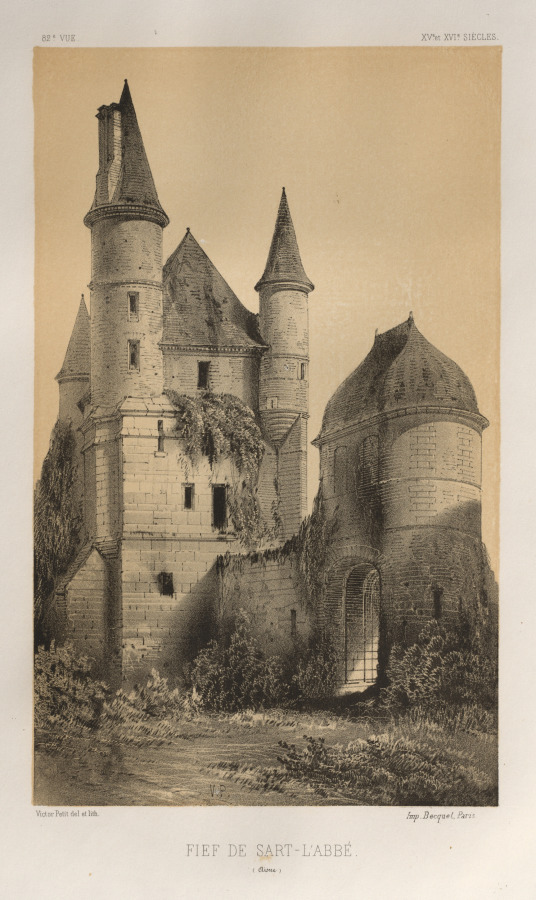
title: Architecture Pittoresque ou Monuments des XVeme. Et XVIeme. Siecles: Chateaux de France des XV et XVI Siecles: Pl. 82, Fief de Sart-l'Abbé (Aisne)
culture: France, 19th century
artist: Victor Petit (French, 1817–1874)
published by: Charles Boivin (publisher and editor); Lith de Godard a Paris (printer)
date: 1860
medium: lithograph with tint stone, from portfolio of 100 lithographs with tint stone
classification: Print